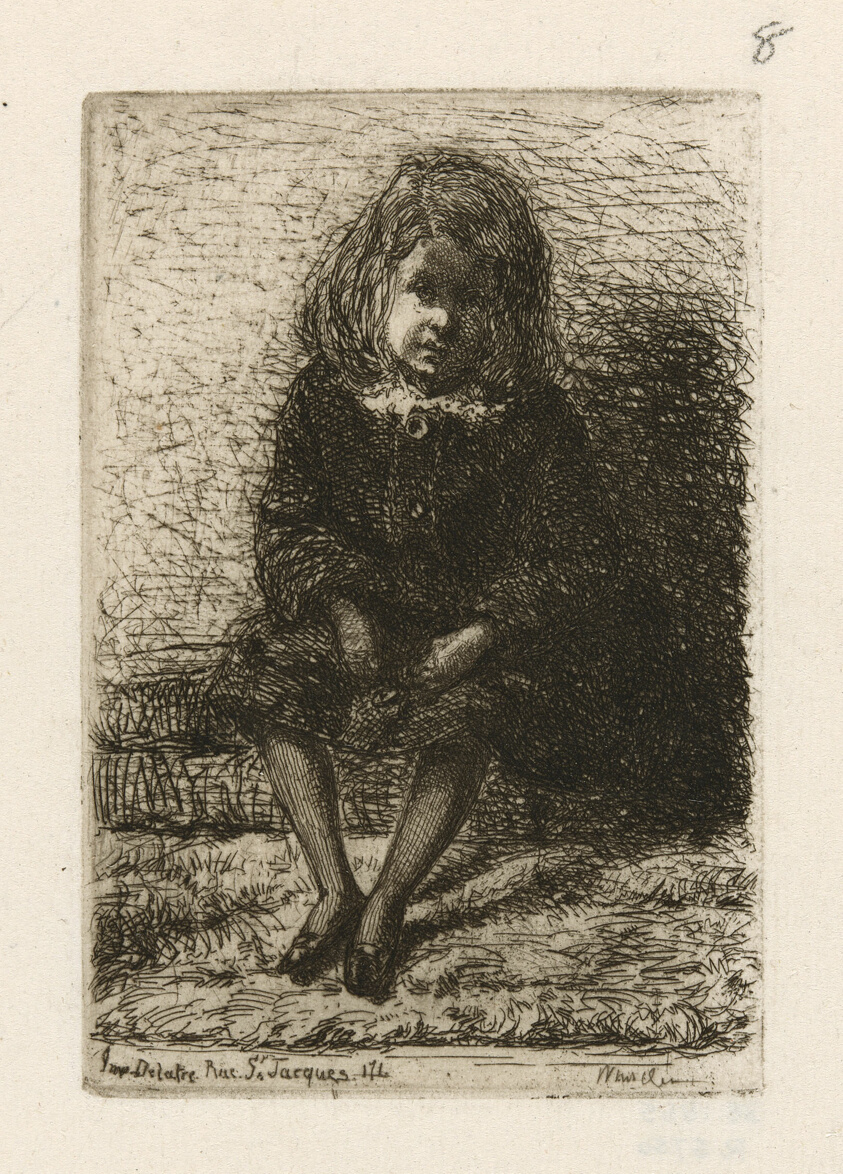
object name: Print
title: Little Arthur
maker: James McNeill Whistler (American, 1834-1903)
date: 1857/58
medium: Etching in black on off-white laid paper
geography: United States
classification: etching; print; prints and drawing; paper